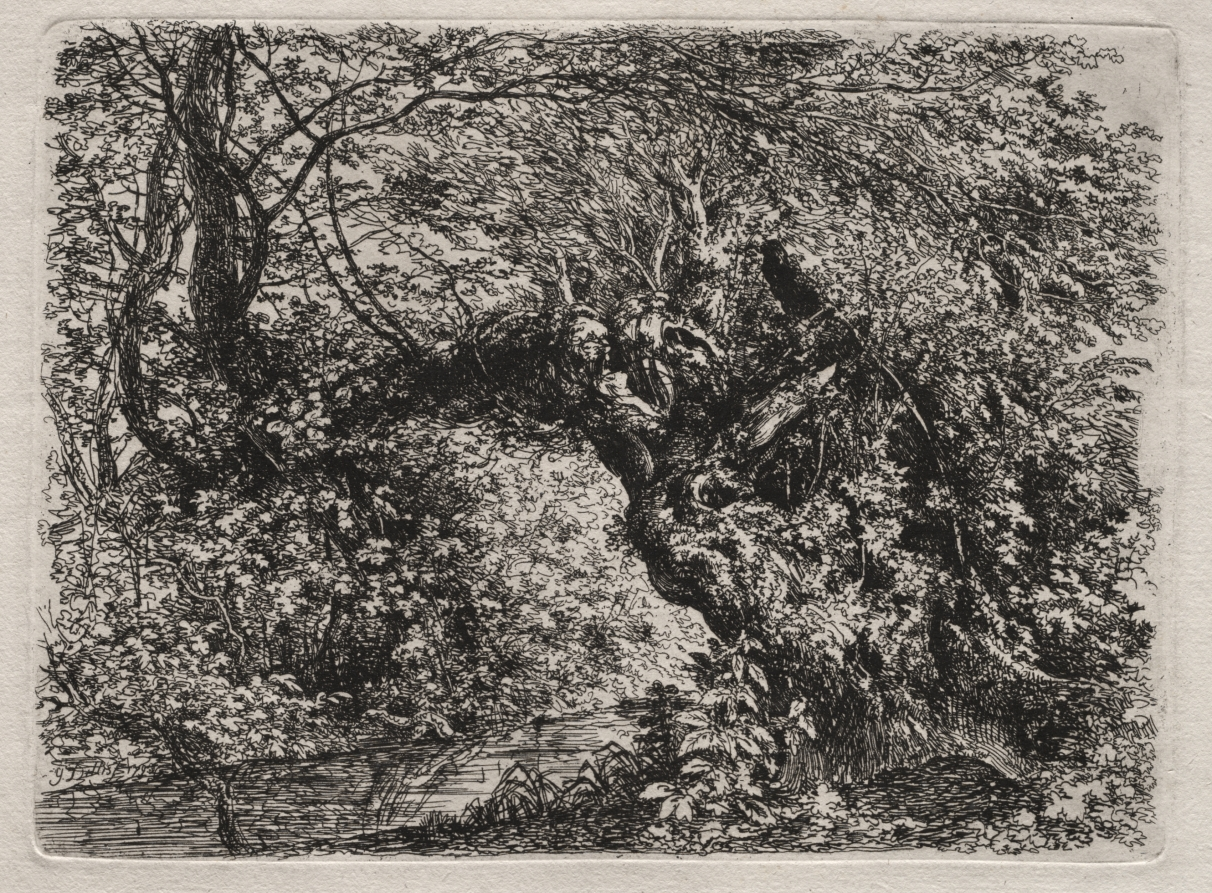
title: The Old Willow at a Brook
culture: Germany, late 18th Century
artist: Georg von Dillis (German, 1759–1841)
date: 1794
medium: etching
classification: Print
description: After an initial phase of classically influenced landscape painting, Dillis’s work achieved a newfound naturalism and freedom. He based this close-up view of a thicket on direct observation of nature. Dillis’s dense network of lines form a filigree-like pattern of trees and foliage. One of only two etchings that Dillis published during his lifetime, this informal composition and its loose style reveal the influence of Jacob van Ruisdael, a Dutch landscapist of the 17th century. In addition to being an artist, Dillis was an outstanding connoisseur and assembled a large print collection of his own. He became one of the first great German museum directors whose impact on the history of art was enormous.